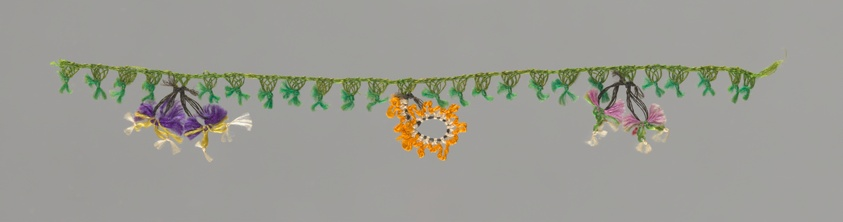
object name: Textile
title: Edging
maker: Eastern Mediterranean, probably Cyprus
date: 1875/1900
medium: Silk, needle lace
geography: Eastern Mediterranean Region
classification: textile; lace - needle